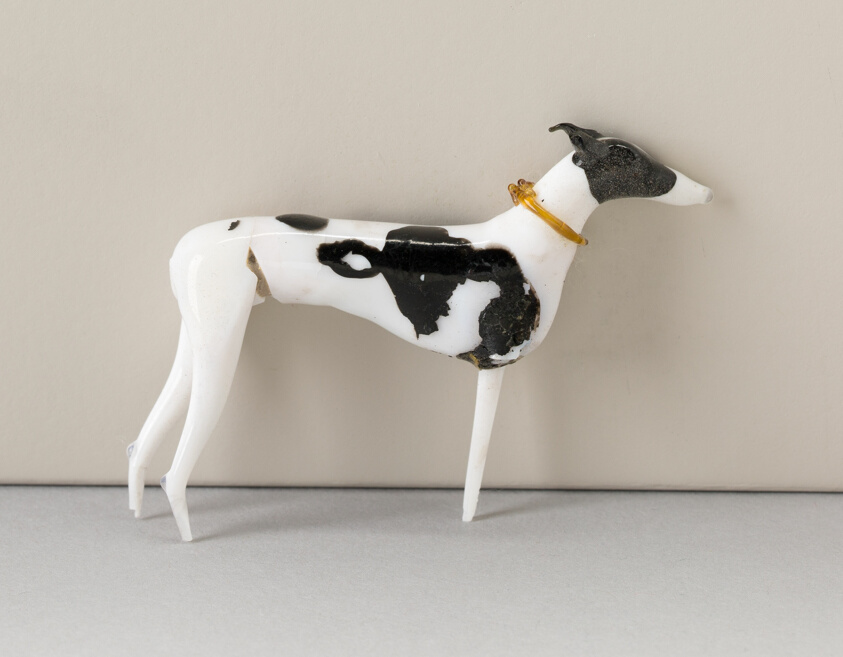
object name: Glass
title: Dog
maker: Nevers, France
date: 18th century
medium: Glass; lampwork (verre de Nevers), metal armature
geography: France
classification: glass; miniature; decorative object/ornament; european decorative arts